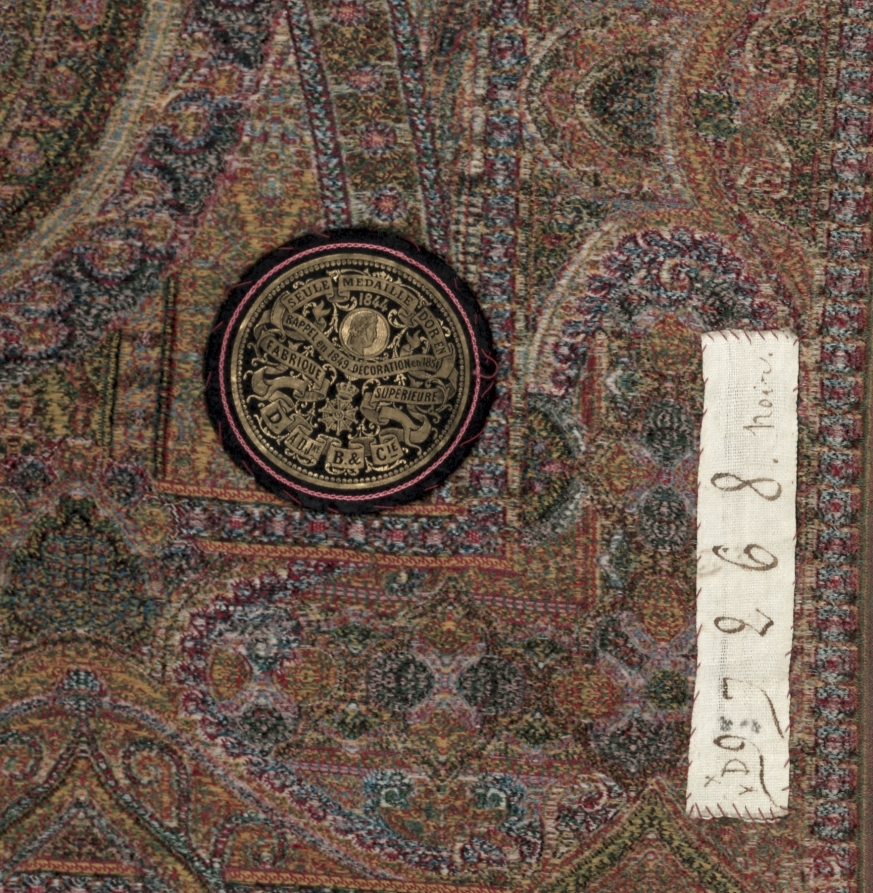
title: Long Shawl with Large Symmetrical Botehs and Small Black Center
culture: France, Paris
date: 1855–62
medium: silk?; supplementary weft pattern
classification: Textile